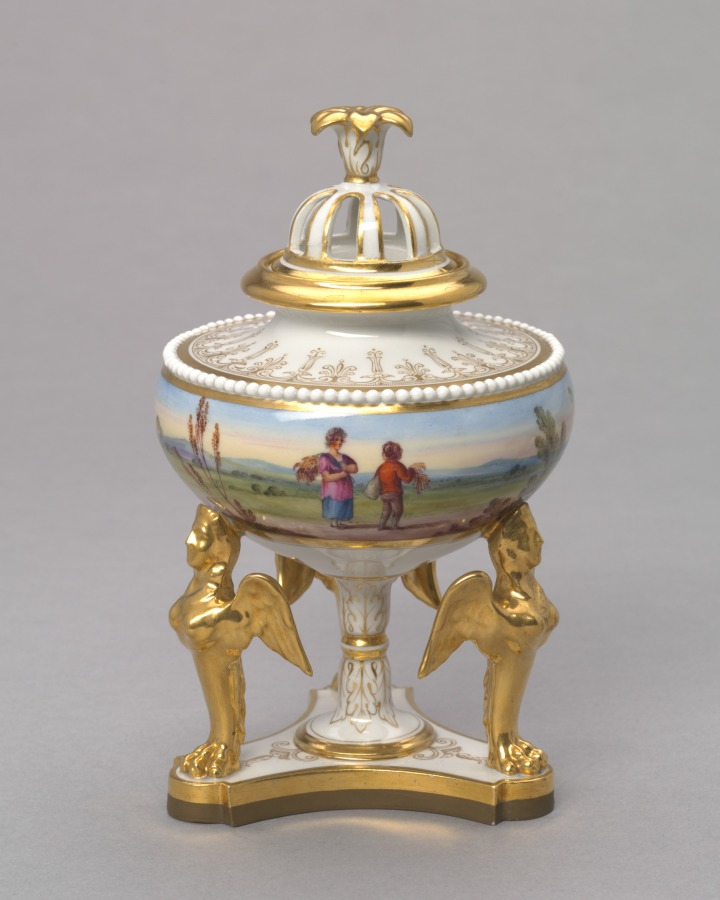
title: Urn and cover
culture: England, Worcester, 19th century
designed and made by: Flight, Barr and Barr (British)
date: c. 1815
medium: artificial porcelain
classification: Ceramic